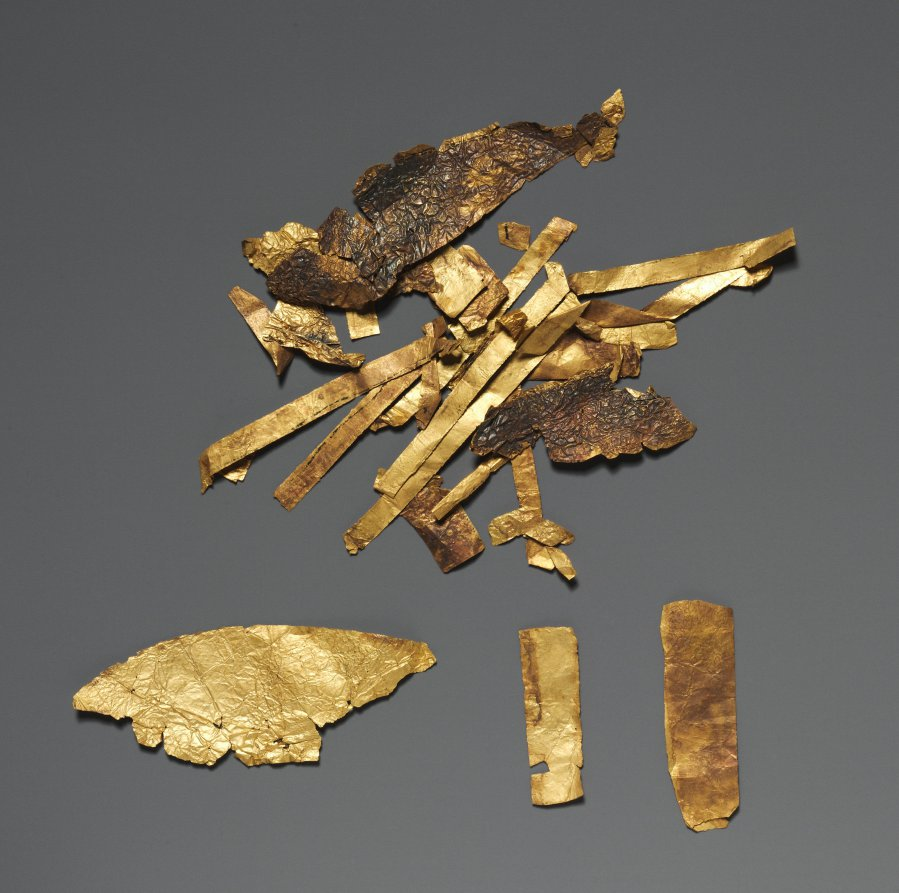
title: Fragments of Decoration from Funerary Equipment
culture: Egypt, Middle Kingdom (2040–1648 BCE)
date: 2040–1648 BCE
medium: gold leaf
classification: Funerary Equipment